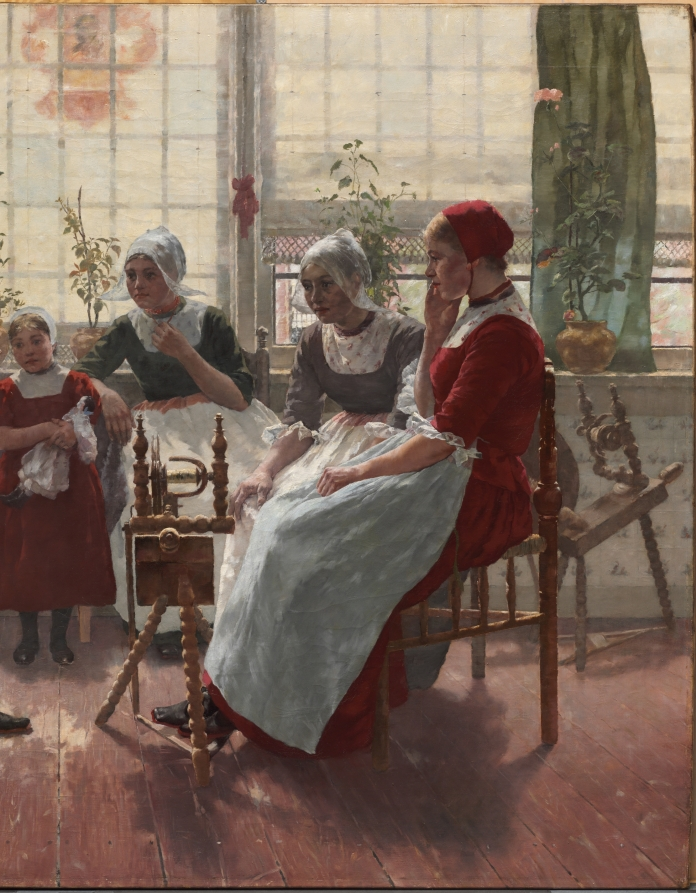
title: The Ghost Story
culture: America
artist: Walter MacEwen (American, 1860–1943)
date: 1887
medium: oil on canvas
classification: Painting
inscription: signed upper left: W. McEWEN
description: During the 1880s, the Netherlands became a magnet for several American artists, among them Walter MacEwen. His most famed painting, The Ghost Story, presents a group of individuals in a Dutch interior listening with rapt attention to spooky narration delivered by a woman at a spinning wheel. A young girl clutches her doll in fascination.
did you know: The women in this painting wear the traditional clothing of Volendam, a fishing village located in the province of North Holland.